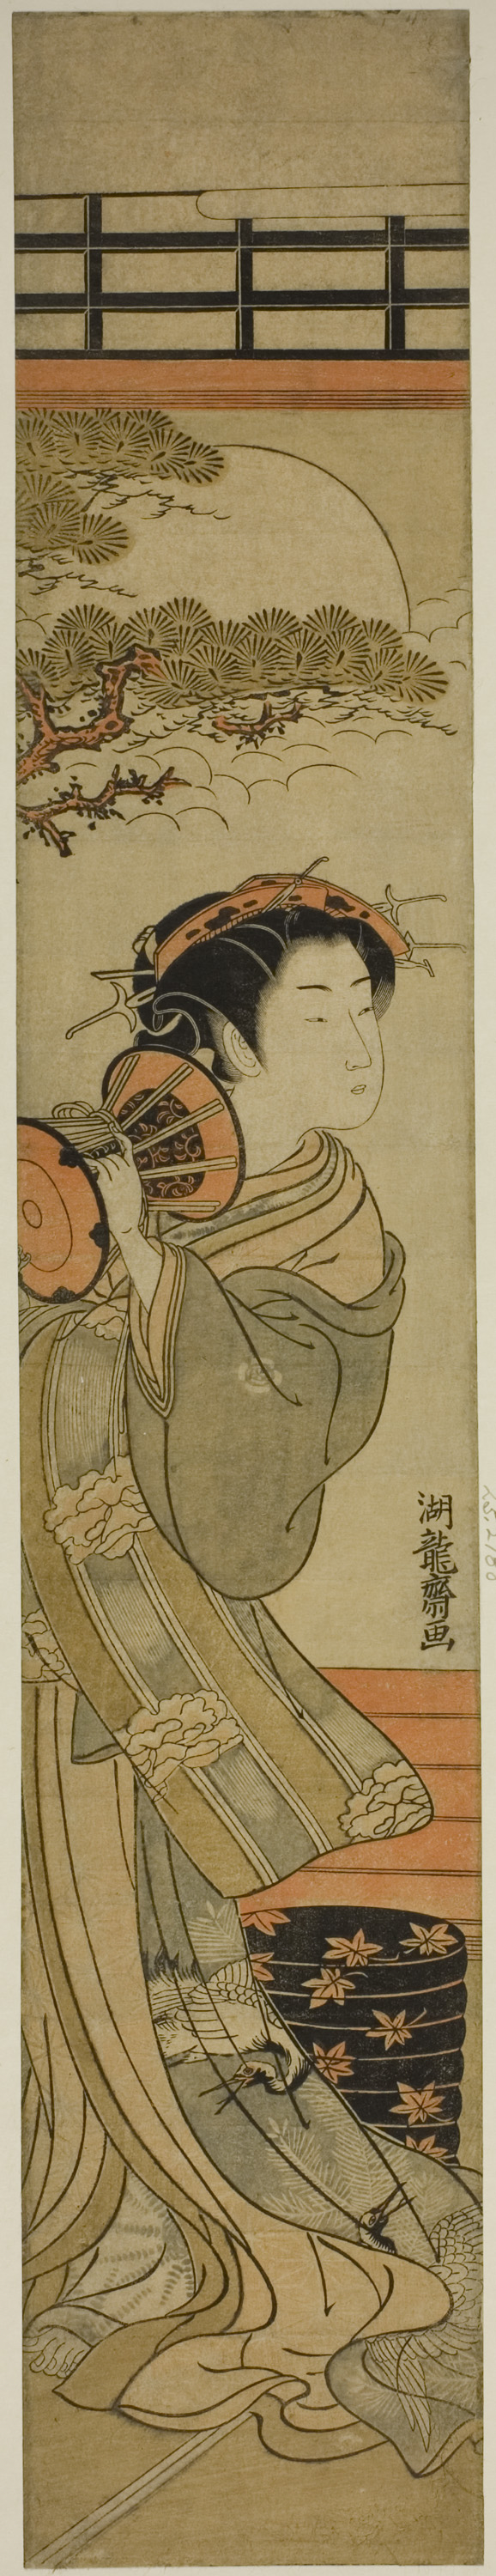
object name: Print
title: Courtesan Playing a Hand Drum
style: Japanese (culture or style)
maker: Isoda Koryusai (Japanese, 1735-1790)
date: c. 1775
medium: Color woodblock print; hashira-e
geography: Japan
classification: woodblock print; print; asian art